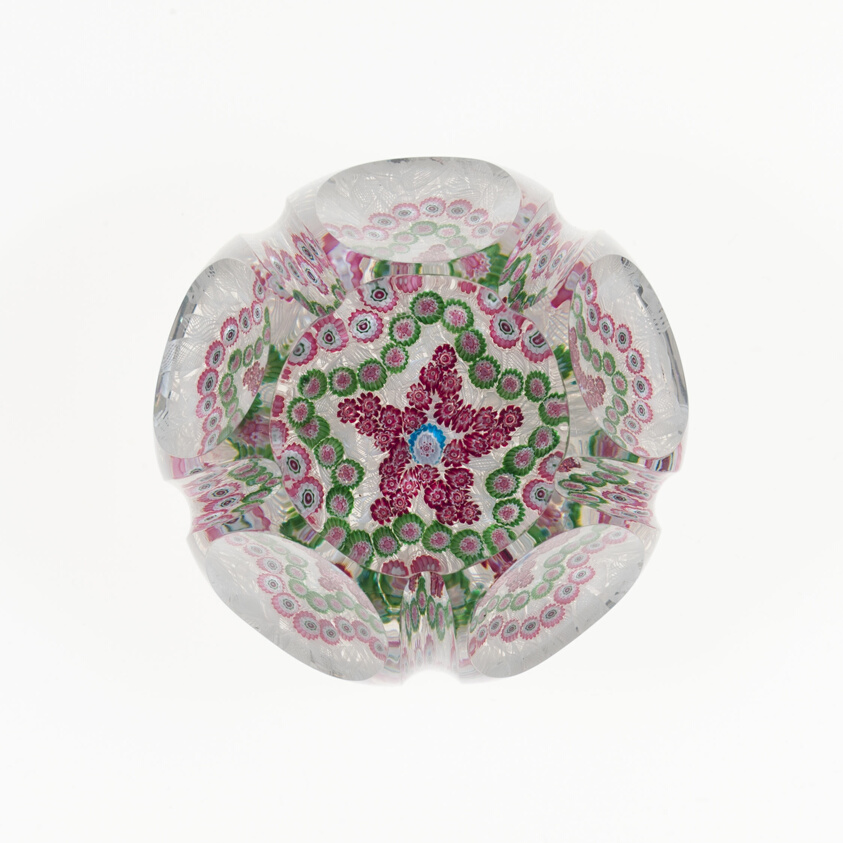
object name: Glass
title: Paperweight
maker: French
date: Mid 19th century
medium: Glass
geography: France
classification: paperweight; millefiori; european decorative arts; glass